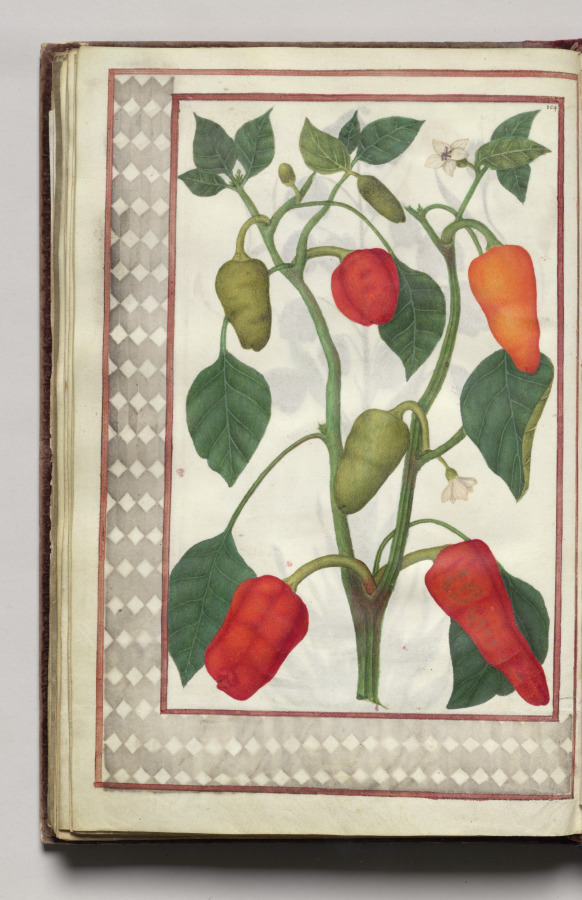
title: Pepper Plant with Geometric Border, folio 46 (verso), from Florilegium (A Book of Flower Studies)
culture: France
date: 1608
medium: watercolor, ink, silver, and gold over occasional traces of pencil, on vellum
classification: Bound Volume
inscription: Dated: Poitiers 1608 (on frontispiece) Signed: On frontispiece in black ink, lower right: Van Kuyk Notation on drawing: Frontispiece: in pencil, lower margin: * élève de Van Kessel, peintre flammand (* in pencil also appears in front of Van Kuyk's name).